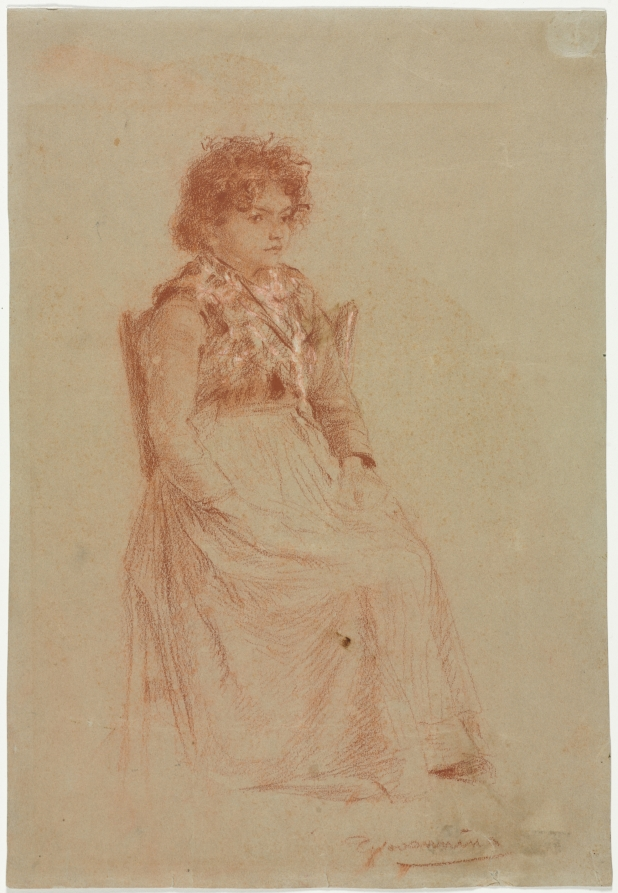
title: Peasant Woman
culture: Austria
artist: Friedrich Gauermann (Austrian, 1807–1862)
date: c. 1825–62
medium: red chalk heightened with white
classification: Drawing